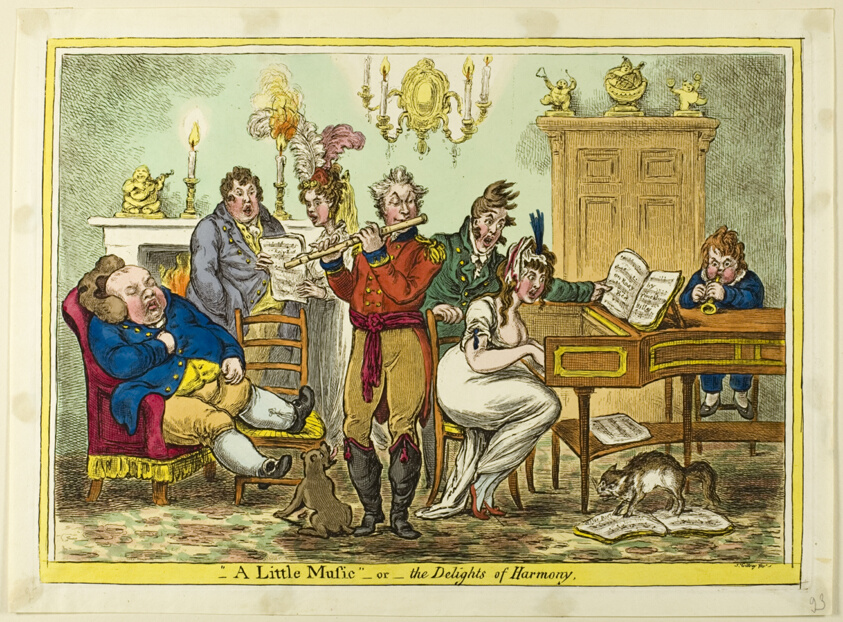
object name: Print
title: A Little Music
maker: James Gillray (English, 1756-1815); published by Hannah Humphrey (English, c. 1745-1818)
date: published February 26, 1810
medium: Hand-colored etching on paper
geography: England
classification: etching; print; prints and drawing